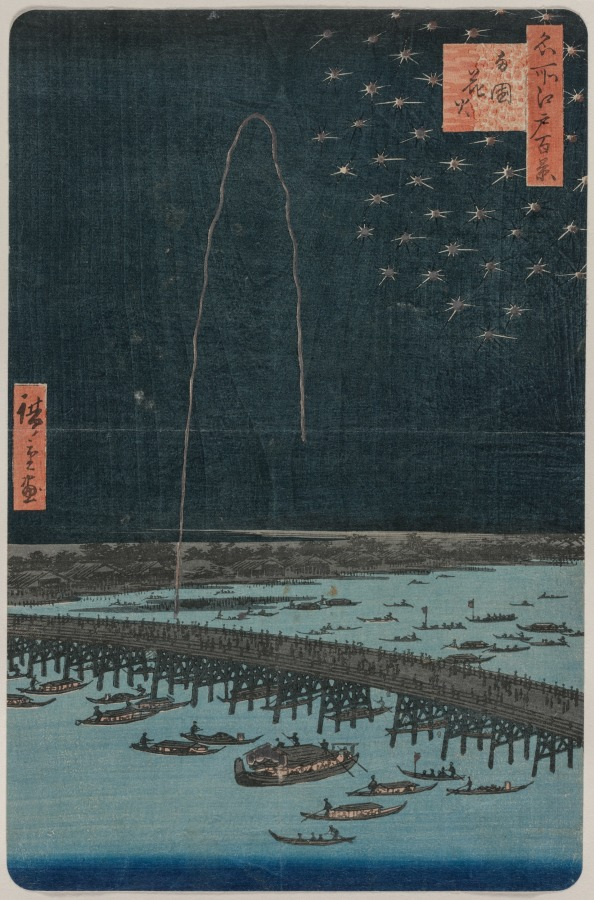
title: Fireworks at Ryōgoku, from the series One Hundred Views of Famous Places in Edo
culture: Japan, Edo period (1615–1868)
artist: Utagawa Hiroshige (Japanese, 1797–1858)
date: 1858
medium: color woodblock print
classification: Print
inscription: Signature: Hiroshige ga. Publisher: Uoya Eikichi (trimmed). Censorship Seal: aratame (trimmed).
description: The Ryōgoku Bridge, a repeated subject of Hiroshige’s prints, spanned the Sumida River connecting bustling Edo (present-day Tokyo) neighborhoods. Here, Hiroshige devoted nearly half the composition to the night sky glittering with fireworks. Restaurants and other businesses along the riverbank frequently sponsored these dazzling displays during the 1850s. The pyrotechnics drew large crowds, who gathered atop the bridge, along the shore, in teashops, and on rented pleasure boats to enjoy the show.